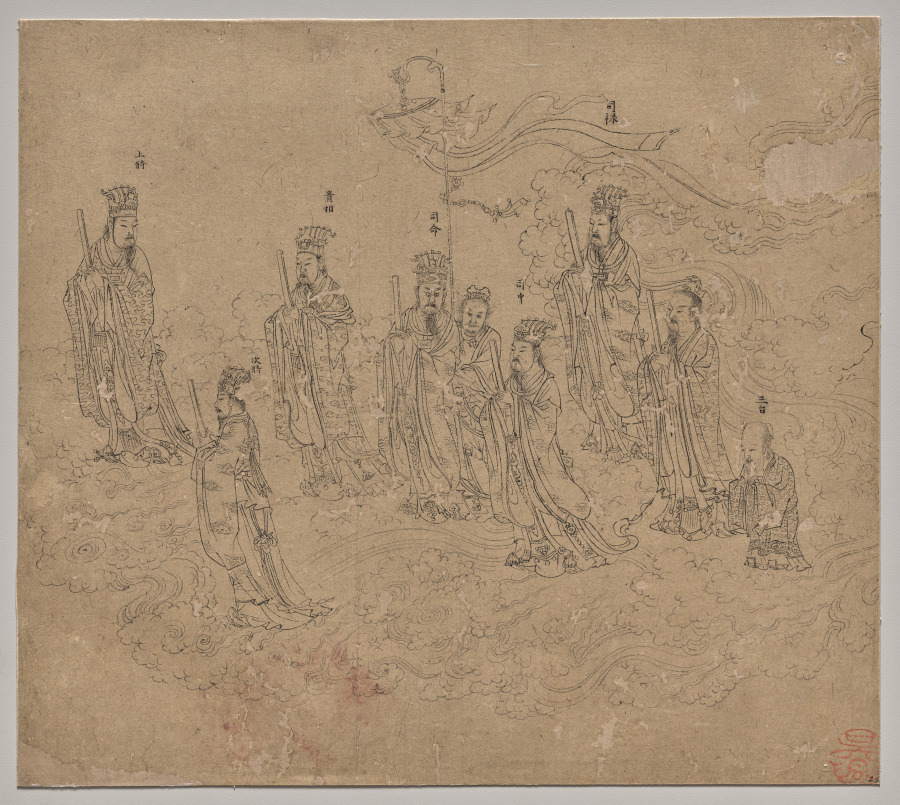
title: Album of Daoist and Buddhist Themes: Procession of Daoist Deities: Leaf 26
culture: China, Southern Song dynasty (1127-1279)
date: 1200s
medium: Album, ink on paper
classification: Painting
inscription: 三台；司錄；司中；司命；貴相；次將；上將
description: This leaf is part of an important album of 50 drawings encompassing three subjects: processions of Daoist deities to the celestial spheres, the Ten Kings of Hell, and Erlang’s Campaign to Rid Mount Guankou of Dangerous Beasts (soushan tu 搜山圖). This section of the Daoist pantheon features the six stars of the Wenchang constellation, plus two attendants and Three Ranks 三台, the short figure on the right. The Superior General 上將 stands a little aloof from the Lieutenant General 次將, Noble Minister 貴相, Director of Destiny 司命, Director of Office 司中, and Director of Emolument 司錄.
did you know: The short figure with the high forehead is the God of Longevity 壽星.